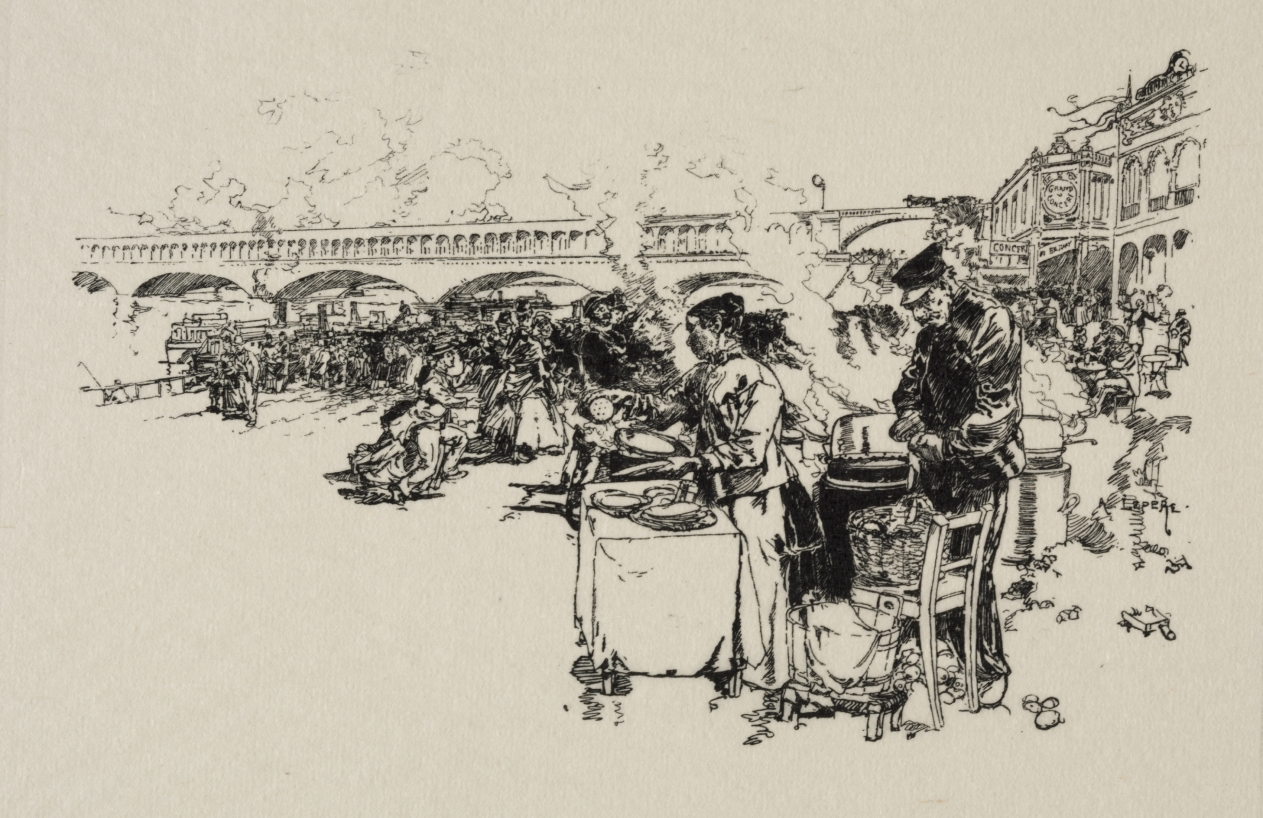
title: Debarcadère des bateaux-omnibus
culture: France, 19th-20th century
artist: Auguste Louis Lepère (French, 1849–1918)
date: c. 1870–1918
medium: wood engraving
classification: Print